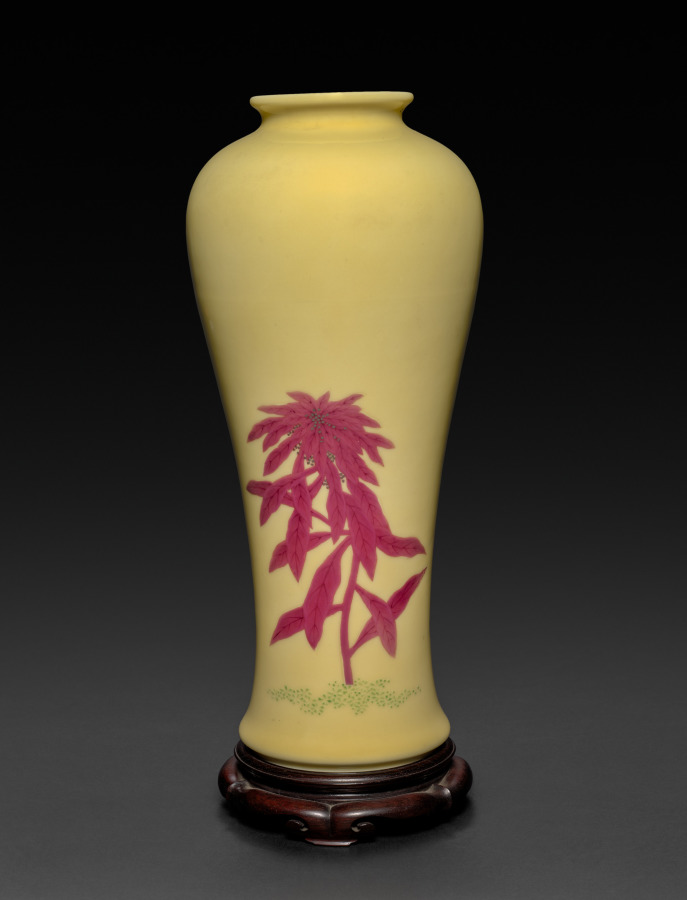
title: Prunus Vase with Amaranth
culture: Japan, Taishō period (1912–26)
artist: Seifū Yohei IV (Japanese, 1872–1951)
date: 1914–46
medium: Porcelain with yellow glaze and overglaze color enamel and gold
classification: Ceramic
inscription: 清風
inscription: 渡邊所藏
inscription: 清風造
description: Yohei IV’s interest in bold, colorful designs is on full display in this vase shaped like a “prunus vase,” or meiping (Japanese meipin). It has two colors of amaranthus on a yellow ground. It follows a design appearing on a sleeve-shaped vase by Yohei III. Yohei IV uses bright spring-green dots of overglaze enamel to suggest a ground plane in his yellow environment; he also uses red and magenta accented with wild gold cascades of dots for two plants he places on opposite sides of the vase, one much larger than the other. In Yohei III’s version, the body of the vessel is white, and the foliage of one plant is red with carefully painted veins in gold, while another plant strategically positioned behind it has a deep rust color, again carefully detailed in gold. In a sense, Yohei IV has deconstructed his father’s logical, balanced design and re-presented it as an emotive, lightheartedly chaotic one that sates the appetite for instant gratification, much as his father’s creation rewards the pursuit of elegance.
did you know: Seifū Yohei IV continued to create works in the studio’s signature colors but also produced pieces with strong color and flare that were his interpretations of Qing dynasty (1644–1911) glazes.